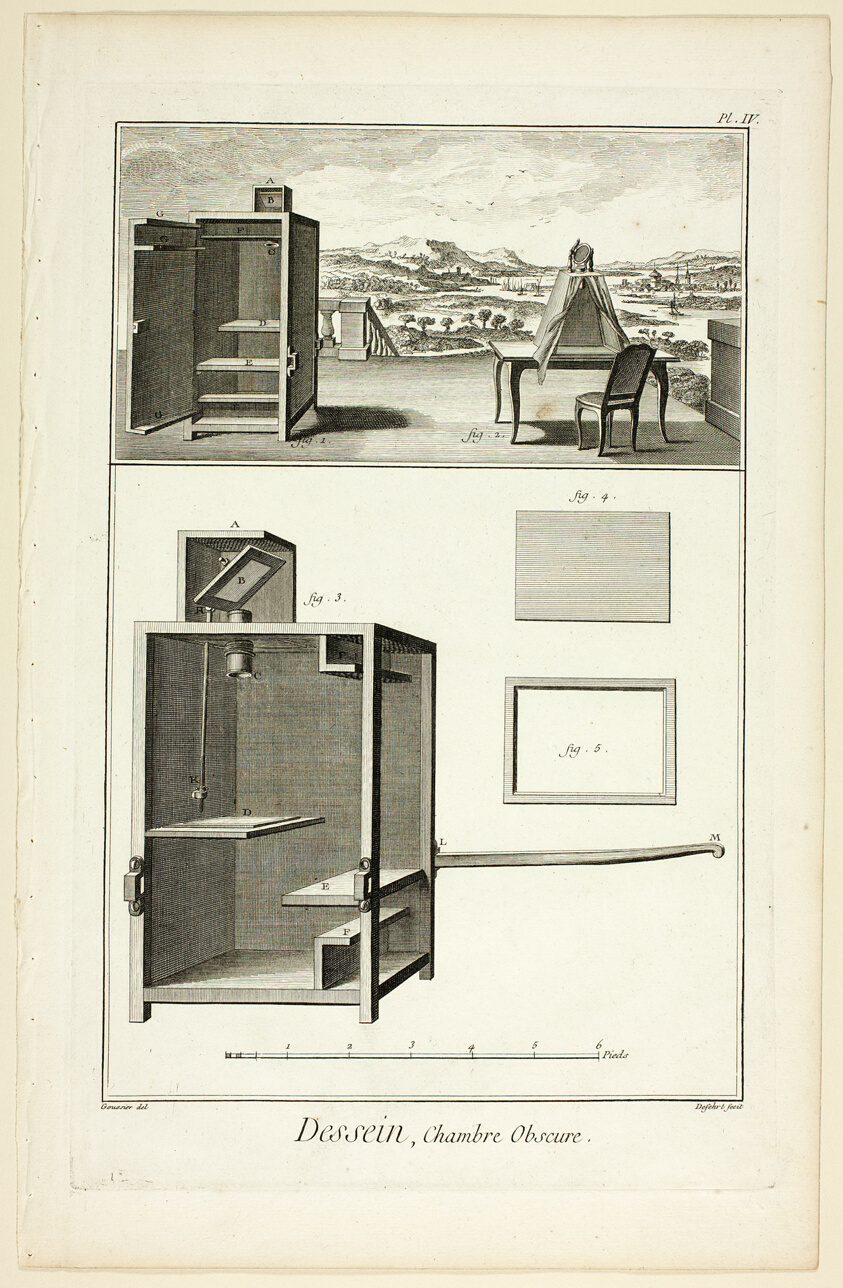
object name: Print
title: Design: Camera Obscura, from Encyclopédie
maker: A. J. Defehrt (French, active 18th century); after Louis-Jaques Goussier (French, 1722-1799); published by André le Breton (French, 1708-1779), Michel-Antoine David (French, c. 1707-1769), Laurent Durand (French, 1712-1763), and Antoine-Claude Briasson (French, 1700-1775)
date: 1762/77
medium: Engraving on cream laid paper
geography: France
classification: etching; print; prints and drawing